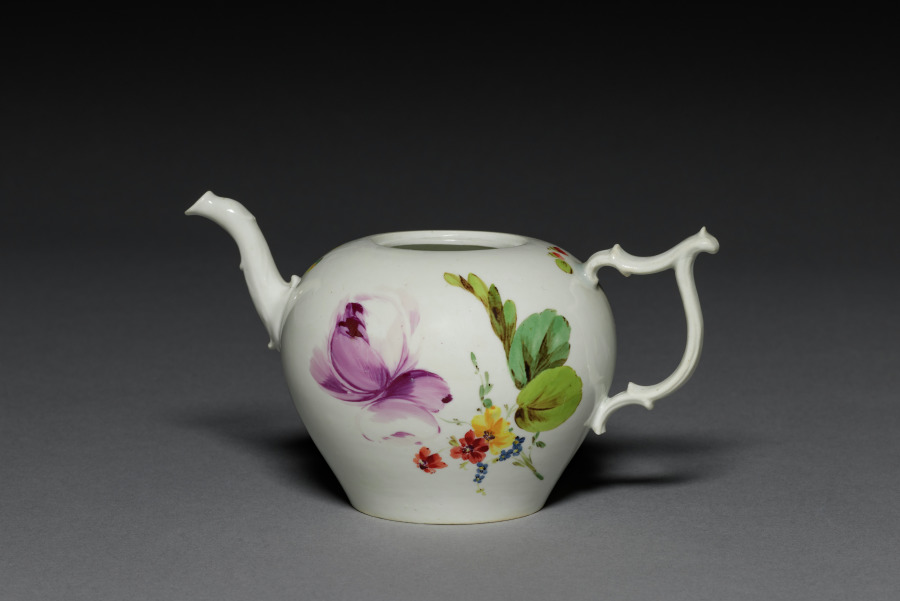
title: Teapot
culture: Germany, late 18th century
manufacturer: Kloster-Veilsdorf Porcelain Factory (German)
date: late 1700s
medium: porcelain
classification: Ceramic